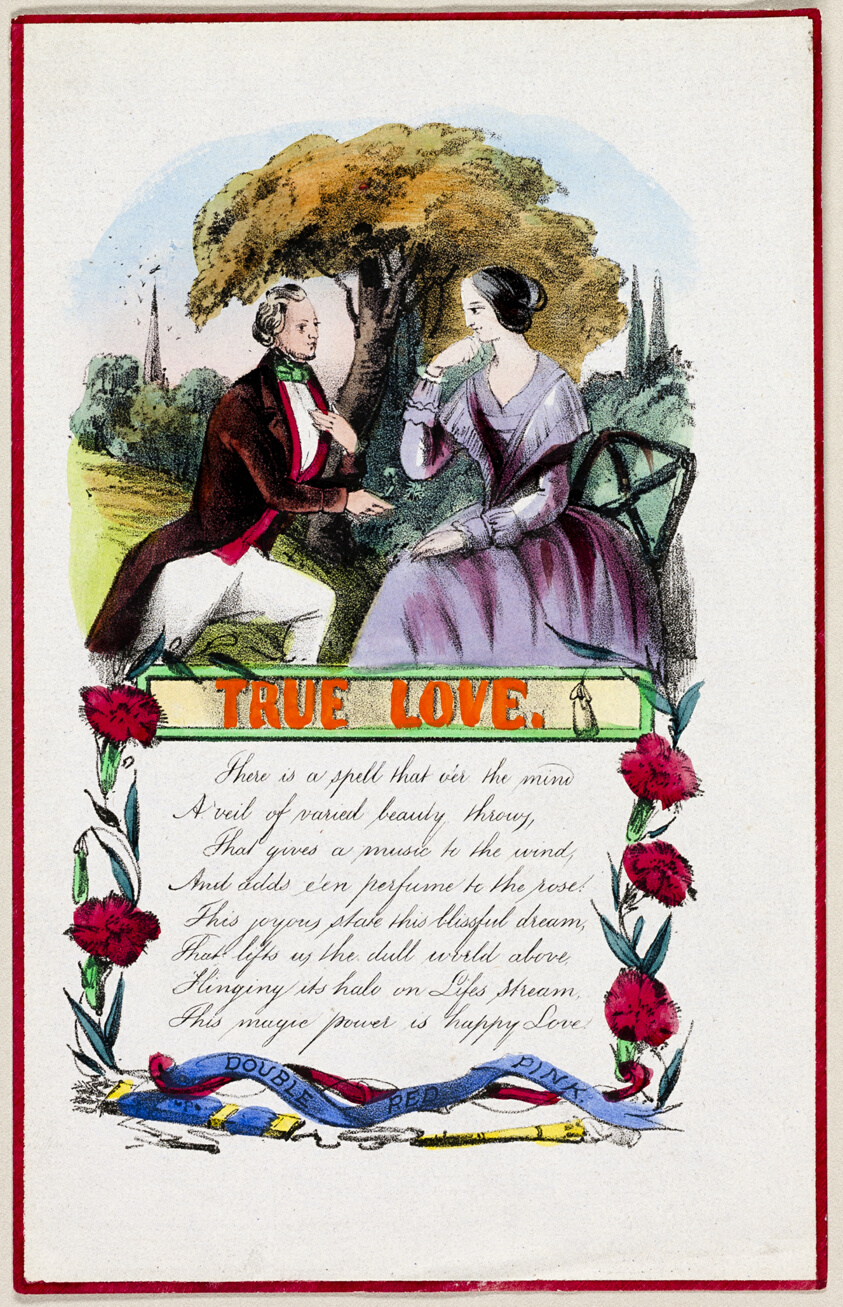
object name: Print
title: True Love (Valentine)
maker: Unknown Artist; English, 19th century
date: c. 1840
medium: Lithograph with hand-coloring on purple-gray laid paper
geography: England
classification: valentine; prints and drawing; print